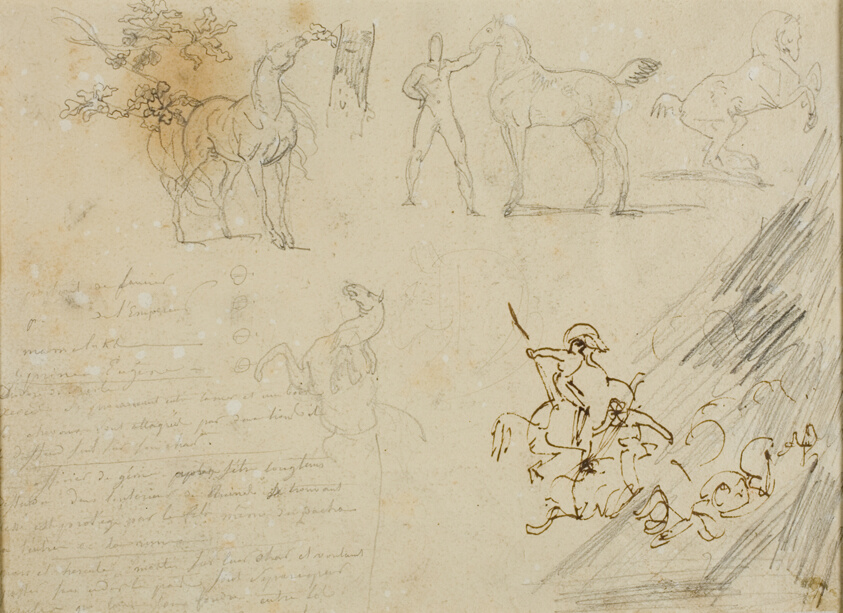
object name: Drawing and Watercolor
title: Sketches of Horses, Groom Holding Horse, a Cavalry Battle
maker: Jean Louis André Théodore Géricault (French, 1791-1824)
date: 1813/14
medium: Graphite with pen and brown ink on cream wove paper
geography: France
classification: drawings (visual works); prints and drawing